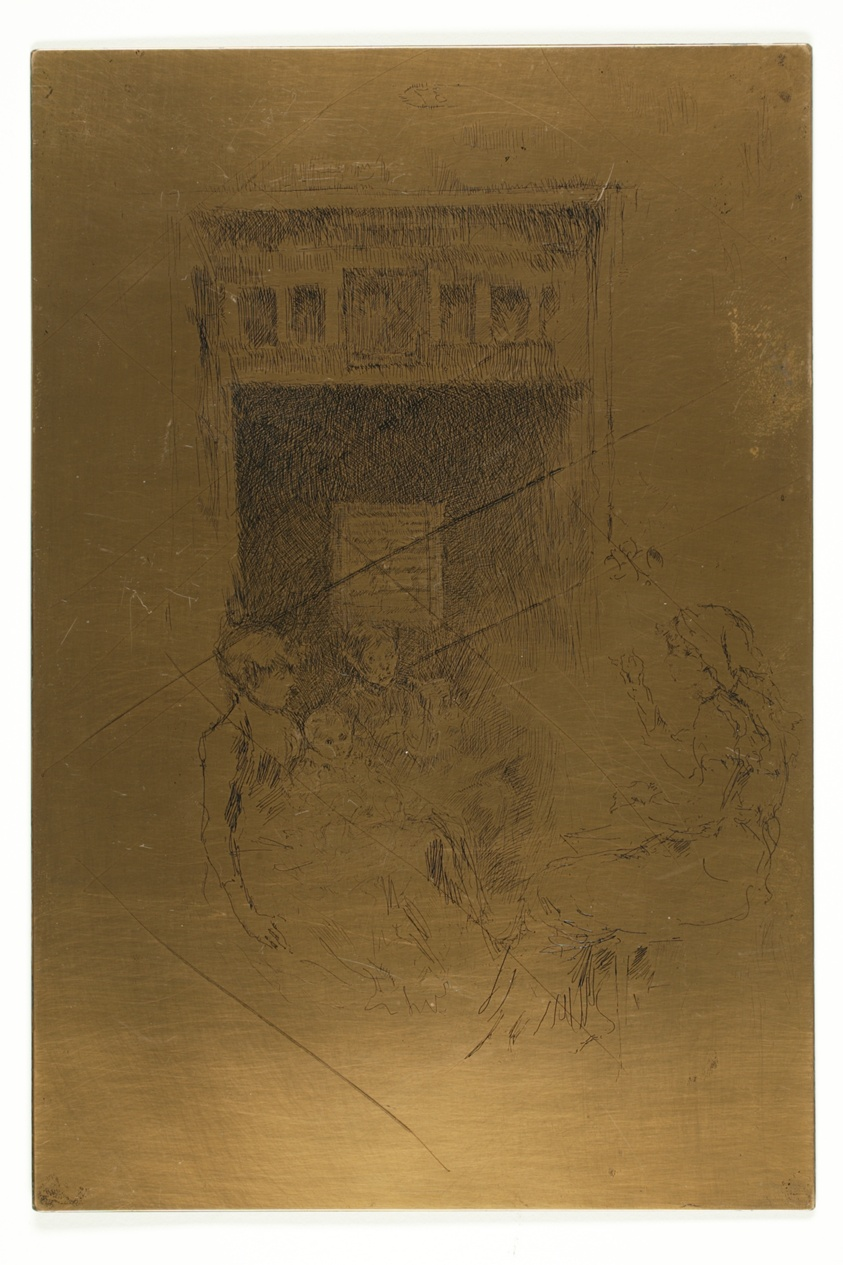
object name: Print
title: Bead Stringers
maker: James McNeill Whistler (American, 1834-1903)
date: 1880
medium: Cancelled copper plate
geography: United States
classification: copper plate; prints and drawing; matrix; print